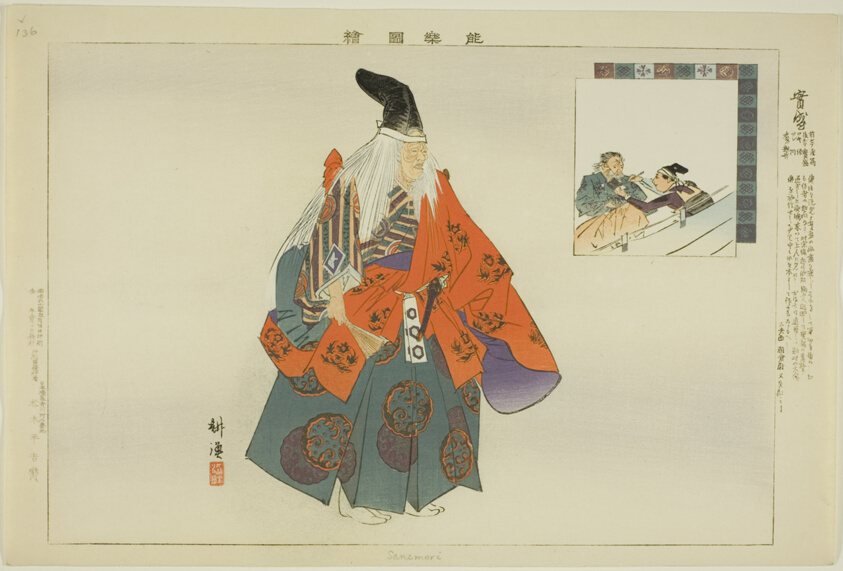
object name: Print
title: Sanemori, from the series "Pictures of No Performances (Nogaku Zue)"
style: Japanese (culture or style)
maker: Tsukioka Kogyo; Japanese, 1869-1927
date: 1898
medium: Color woodblock print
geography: Japan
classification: woodblock print; print; asian art